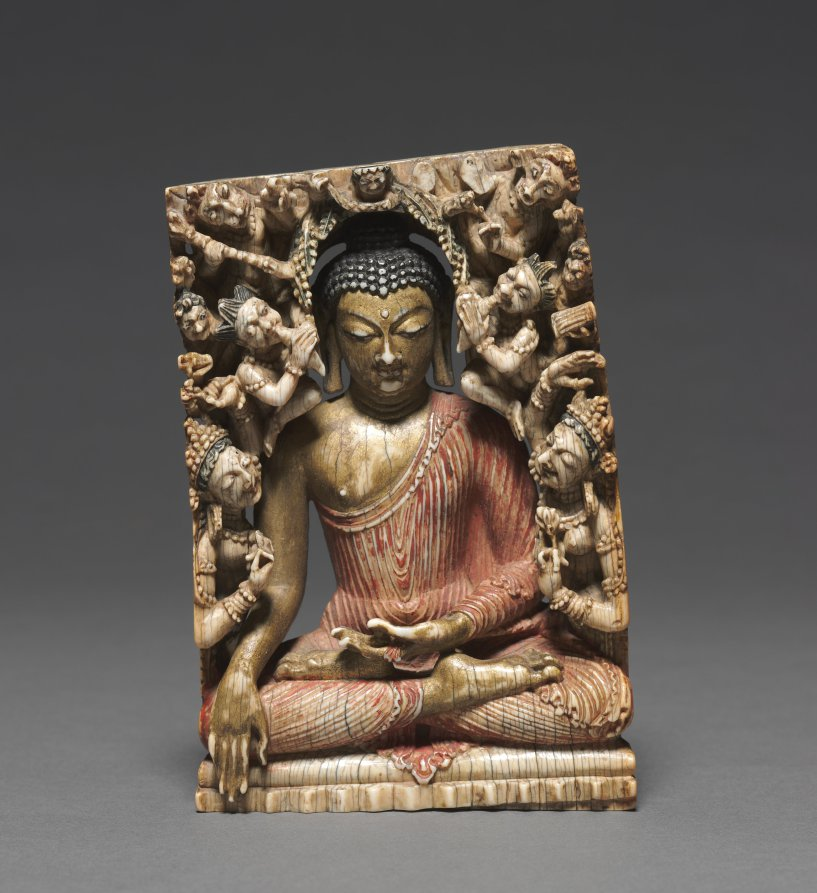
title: Temptation of Buddha by the Evil Forces of Mara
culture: Northern India, Kashmir, 8th century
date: 700s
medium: ivory with gold and polychrome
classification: Ivory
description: Intimate shrines for personal meditation practices contained scenes from the life of the Buddha. In an episode just prior to his achievement of enlightenment, the Buddha sat in meditation and faced personifications of the final obstacles. In this exquisite rendering derived from the Greco-Roman realism of Gandharan art, demons attack him in an attempt to scare him off the path. Seductive women do their best to distract him. He remains placid and firm in his conviction that these beings have no inherent reality, and he renders them powerless.